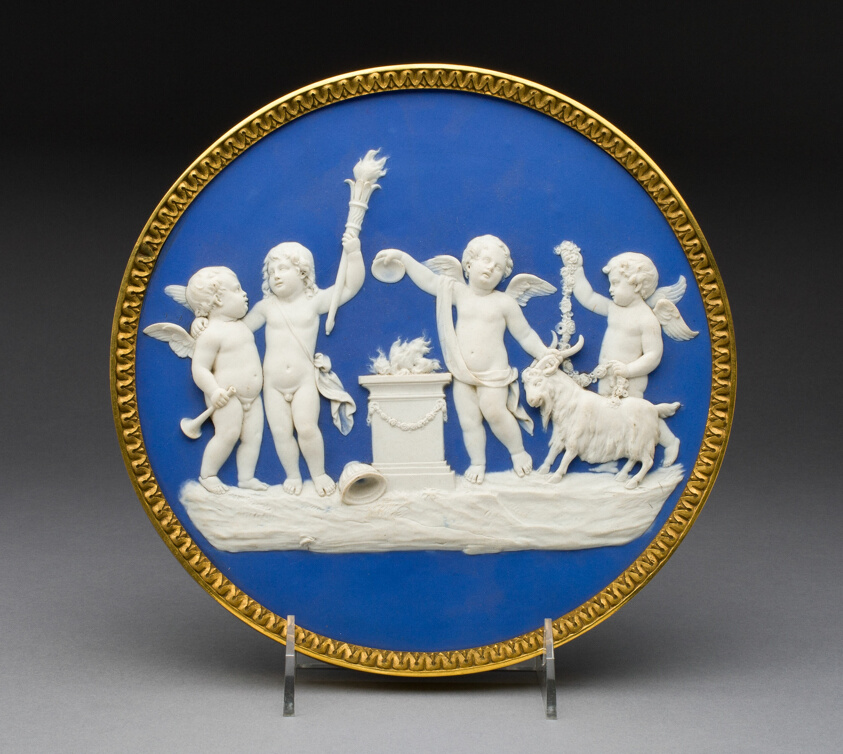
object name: Ceramics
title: Plaque with Sacrifice to Hymen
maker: Wedgwood Manufactory (England, founded 1759)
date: 1789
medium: Stoneware (jasperware)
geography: Burslem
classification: sculpture; stoneware; european decorative arts; ceramics